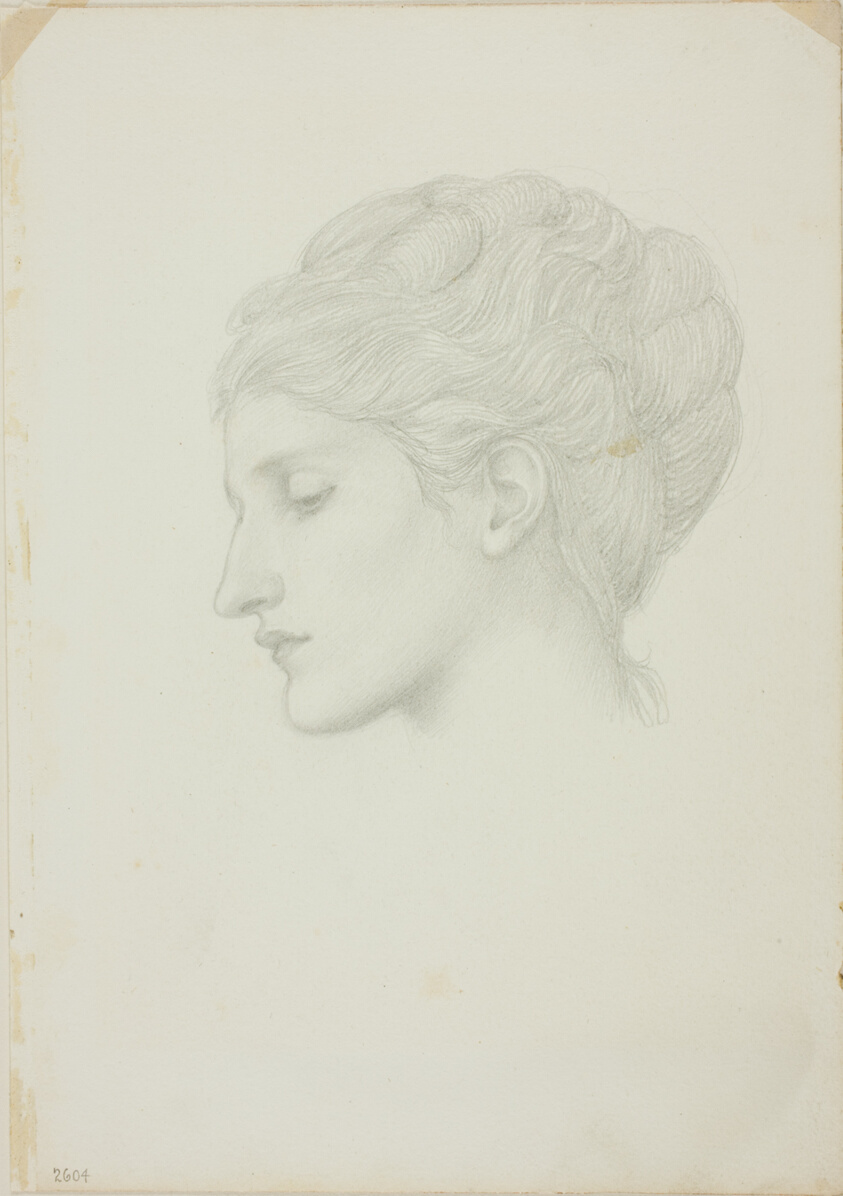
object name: Drawing and Watercolor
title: Woman's Head in Profile to Left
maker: Sir Edward Burne-Jones (English, 1833-1898)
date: c. 1873–77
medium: Graphite on ivory wove paper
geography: England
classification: graphite; drawings (visual works); prints and drawing